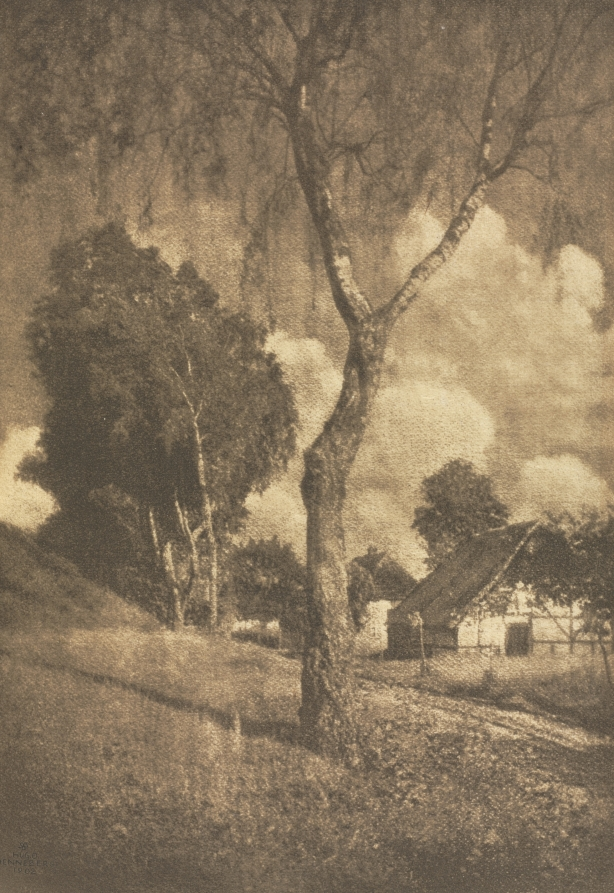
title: Camera Work: Pomeranian Motif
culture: Austria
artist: Hugo Henneberg (Austrian, 1863–1918)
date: 1906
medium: photogravure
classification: Bound Volume